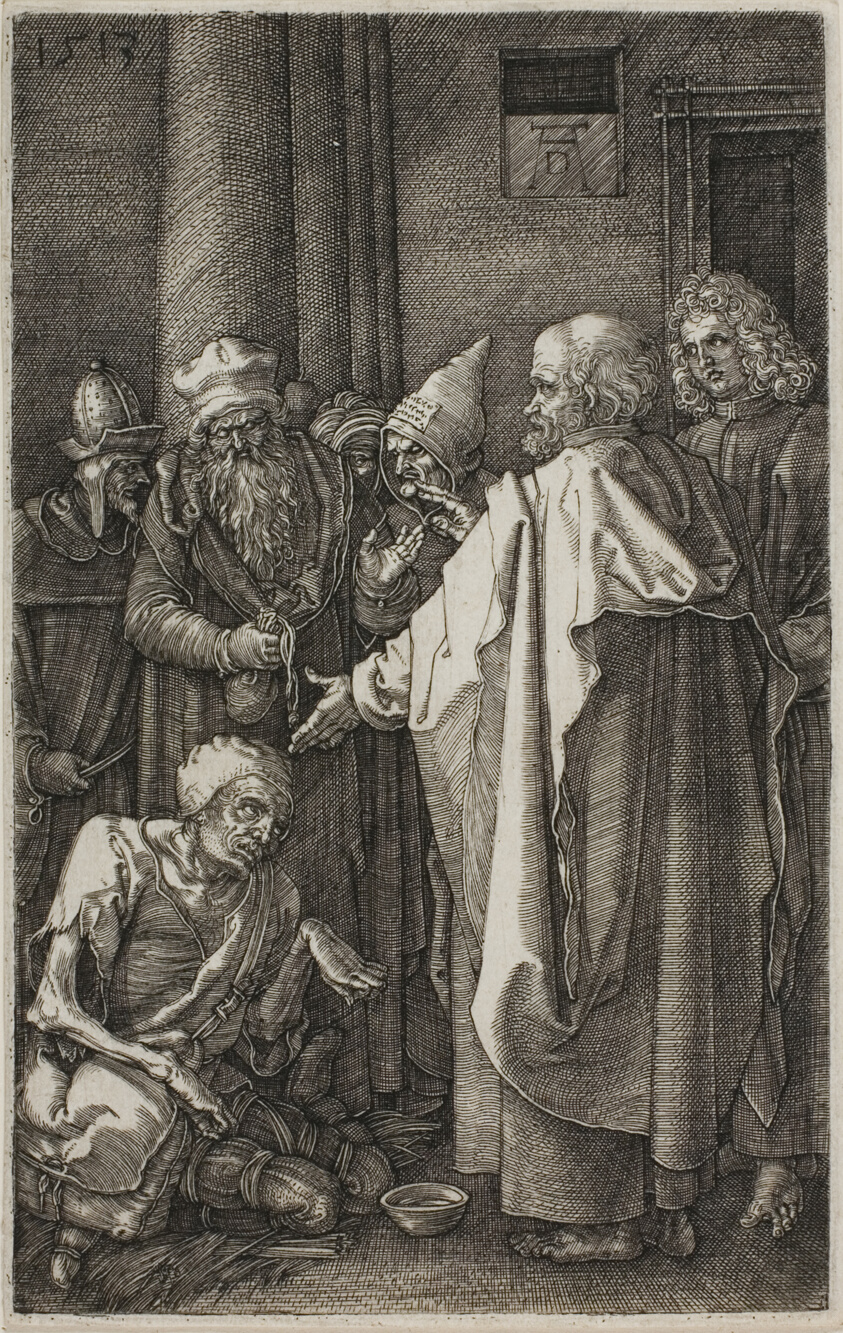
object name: Print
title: St. Peter and St. John Healing the Cripple, from The Engraved Passion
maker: Albrecht Dürer (German, 1471-1528)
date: 1513, published 1513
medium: Engraving in black on ivory laid paper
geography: Germany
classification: engraving; print; prints and drawing; paper